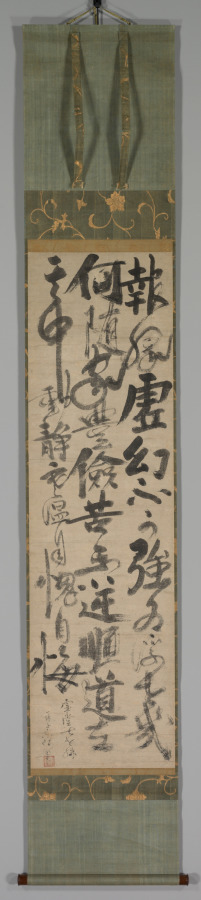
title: Reflections of Priest Foyen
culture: Japan, Muromachi period (1392–1573)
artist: Ikkyū Sōjun (Japanese, 1394–1481)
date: 1400s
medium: hanging scroll, ink on paper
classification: Painting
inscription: signed: "Kido nanasei son, Ikkyūshi Sōjun sho (Written by Ikkyū Sōjun, the seventh generation of Kido)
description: Left by his mother at a small Zen temple in Kyoto at the age of six, Ikkyu later drew on his early studies and experiences for his writings, which focused on his keen interest in the Chinese classics. Poetry in particular was a favorite subject and images from classical poetry or passages from favorite poems or commentaries frequently provided Ikkyu with the core ideas for his own work. A rare example of his calligraphy, this narrow scroll contains a verse in eight phrases, each comprising four characters. The whole verse is organized in three towering lines of brusque, emphatic calligraphy augmented by Ikkyu's signature-the two lines of running script in the lower left corner. The text refers to a passage included in the Chronicle of the Zen Sect that contains a cautionary reminder attributed to the legendary Chinese monk Foyen Qingyuan (1067-1120), long revered in Japan. The initial phrase begins: "Life is a mirage."